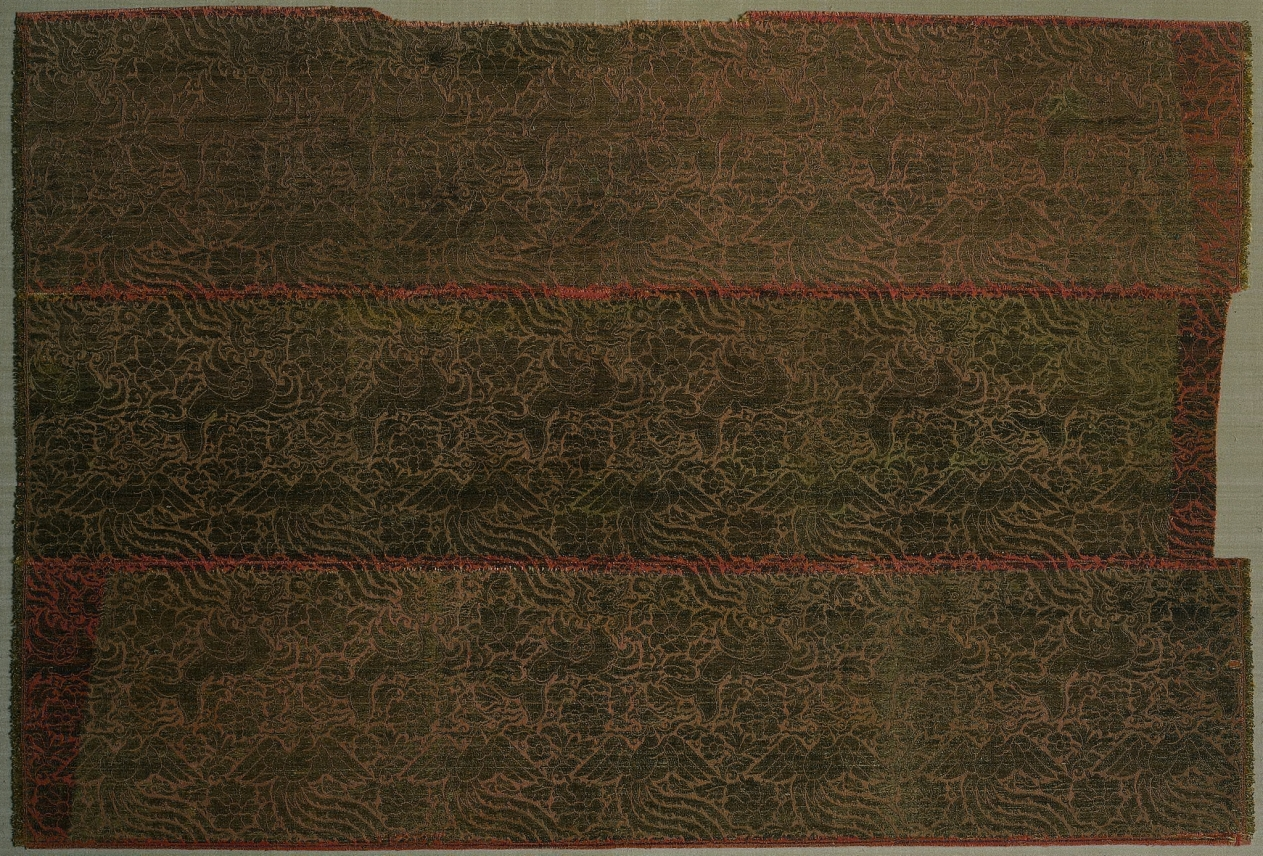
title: Makaras, Phoenixes and Flowers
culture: Central Asia or Daidu, 13th century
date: 1200s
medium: lampas, silk and gold thread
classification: Textile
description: Central Asian designers drew from a wide variety of motifs, both imaginary and real. In this silk, rows of soaring phoenixes alternate with rows of makaras. Combining a fish body and tail, wings, and a dragon's head, the makara originated in India as a water creature. With the spread of Buddhism, the motif migrated into the art of Central Asia and, from there, into the art of northern China. In Italy, exotic Central Asian patterns such as this inspired flights of imagination. One such example (seen in the photograph below) shows a creature, strikingly similar to the makara, spewing forth a dragon while a dog walks up its back.